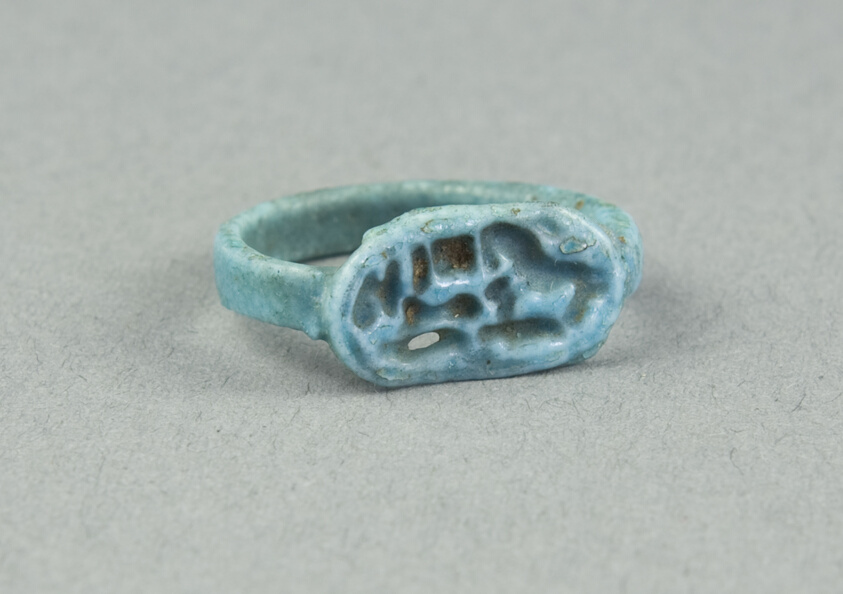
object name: Costume and Accessories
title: Ring: Seti, Beloved of Ptah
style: nineteenth dynasty, new kingdom, egyptian, ancient, ramesside period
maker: Egyptian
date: New Kingdom, Dynasty 19, reign of Seti II (about 1200–1194 B. C.)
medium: Faience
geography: Egypt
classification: ring (jewelry); ceramics; jewelry; ancient art; costume; faïence (composite material)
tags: Hieroglyphs